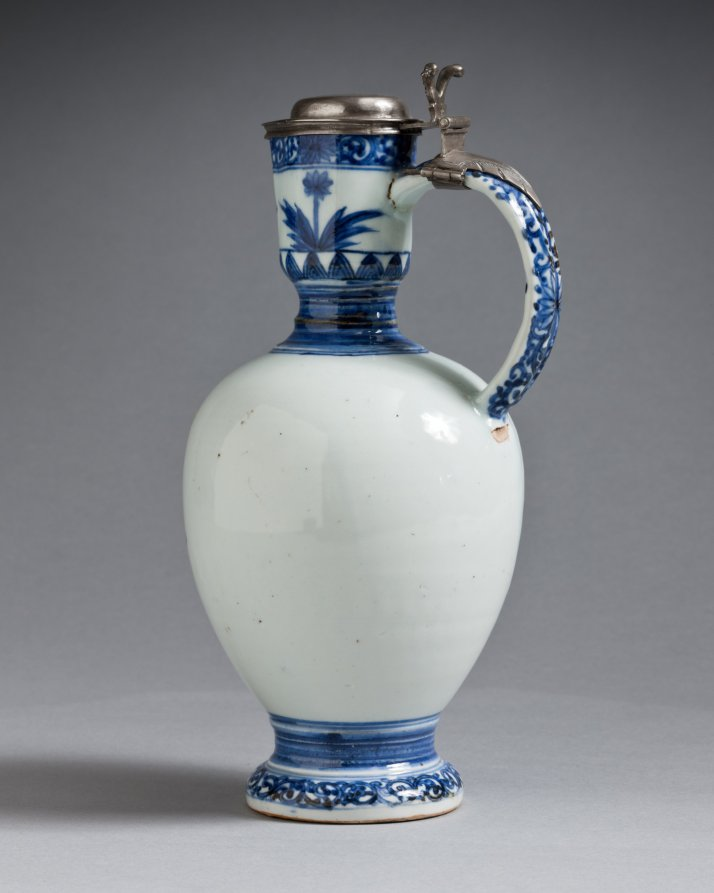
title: Jug with Silver Mounts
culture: Japan, Edo period (1615–1868)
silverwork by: Barent van Leeuwen (Dutch, 1637–1682)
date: c. 1662–76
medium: porcelain with underglaze blue decoration and silver mounts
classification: Ceramic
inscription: [on silver]: town mark for Amsterdam; lion rampant crowned (alloy mark for 0-934 silver); d (date letter for 1666), maker's mark of Barent van Leeuwen.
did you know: The coat of arms on this jug are those of the Valckenier family, active in the Dutch East India Company.